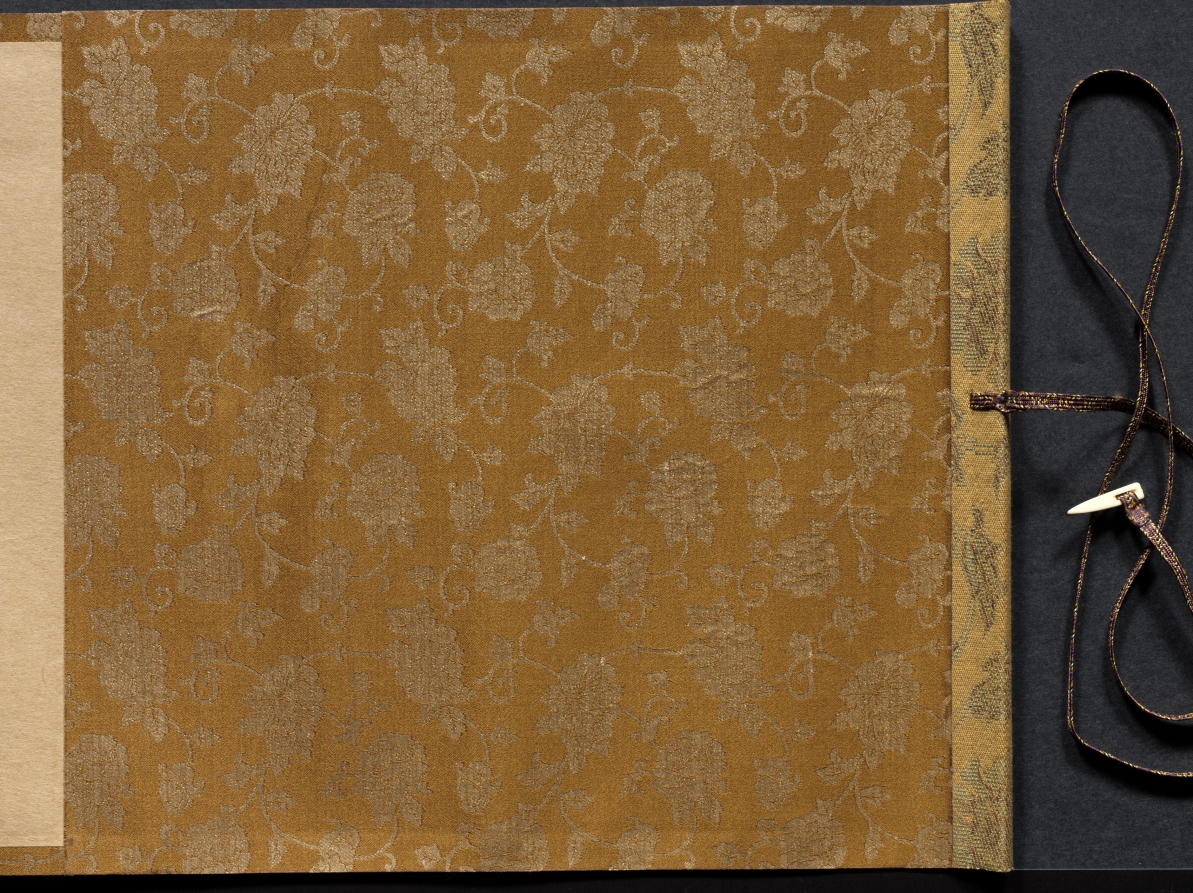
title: The Illustrated Tale of Oishi Hyōroku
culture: Japan, Edo period (1615–1868)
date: 1700s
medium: handscroll; ink and color on paper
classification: Painting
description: This incomplete handscroll illustrates part of the story of Oishi Hyoroku, a young man tasked with battling fox apparitions who were creating problems in his town. In other extant versions of the scroll, the story is set in the fall of 1624 in Kagoshima in southern Japan. Throughout the story, Hyoroku is tricked and terrified by the foxes that shift their shapes into a variety of monstrous phantoms. After repeated humiliations, he eventually captures two of the foxes. In this version, colloquial texts that function like text blurbs in comics appear throughout the scroll, but the main text is missing.